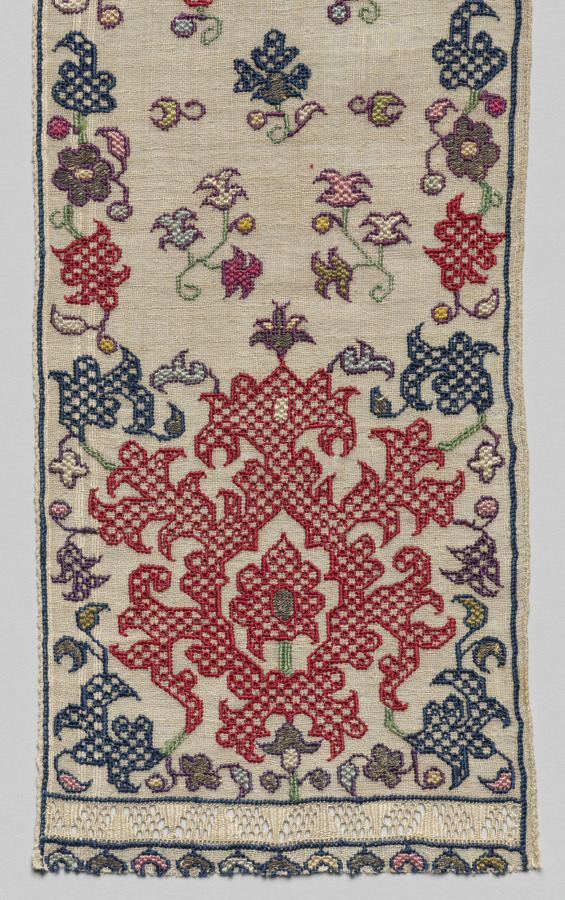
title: Part of a Cap (beniqa)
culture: Africa, North Africa, Algeria, Algerian embroiderer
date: 1700s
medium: Linen, silk, metal, dye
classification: Embroidery